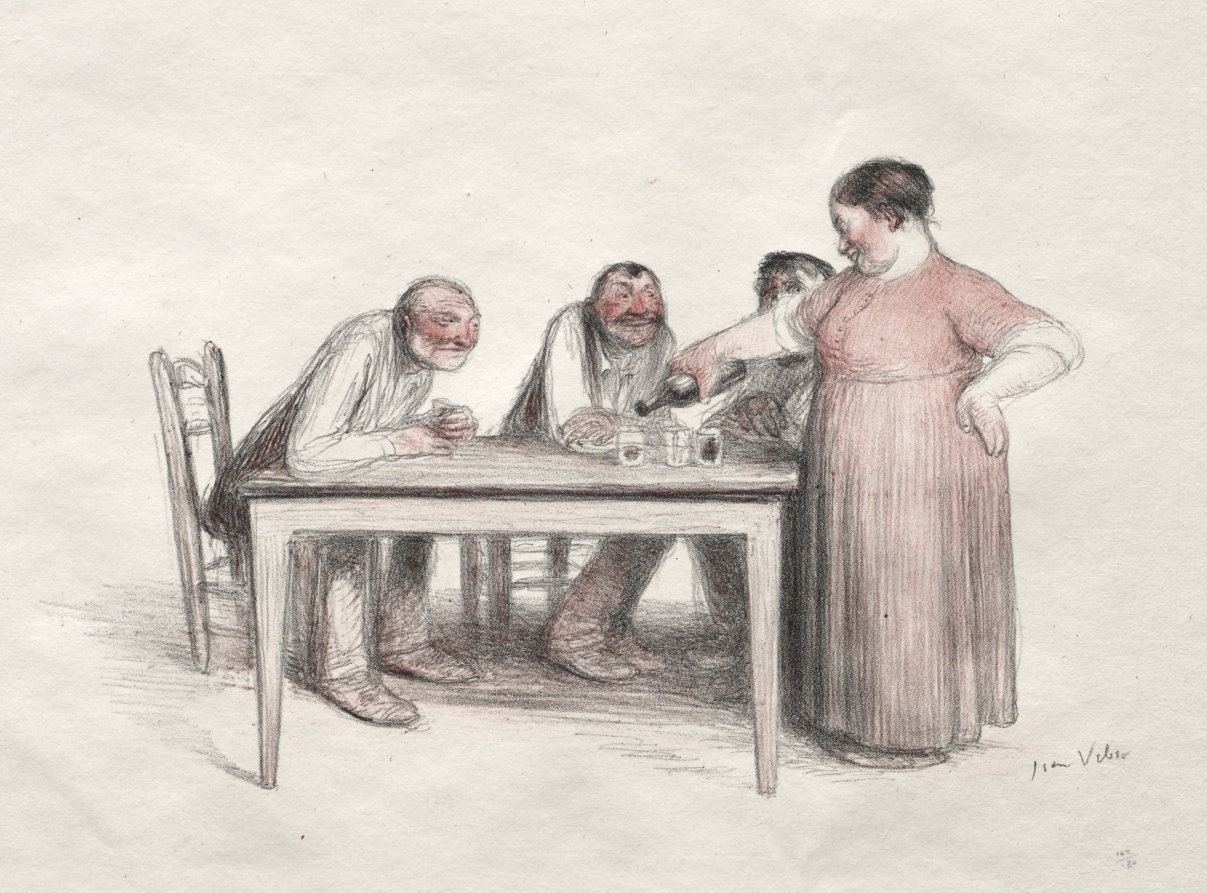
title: The Glass of Wine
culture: France, 19th century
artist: Jean Veber (French, 1864–1928)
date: c. 1905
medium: color lithograph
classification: Print